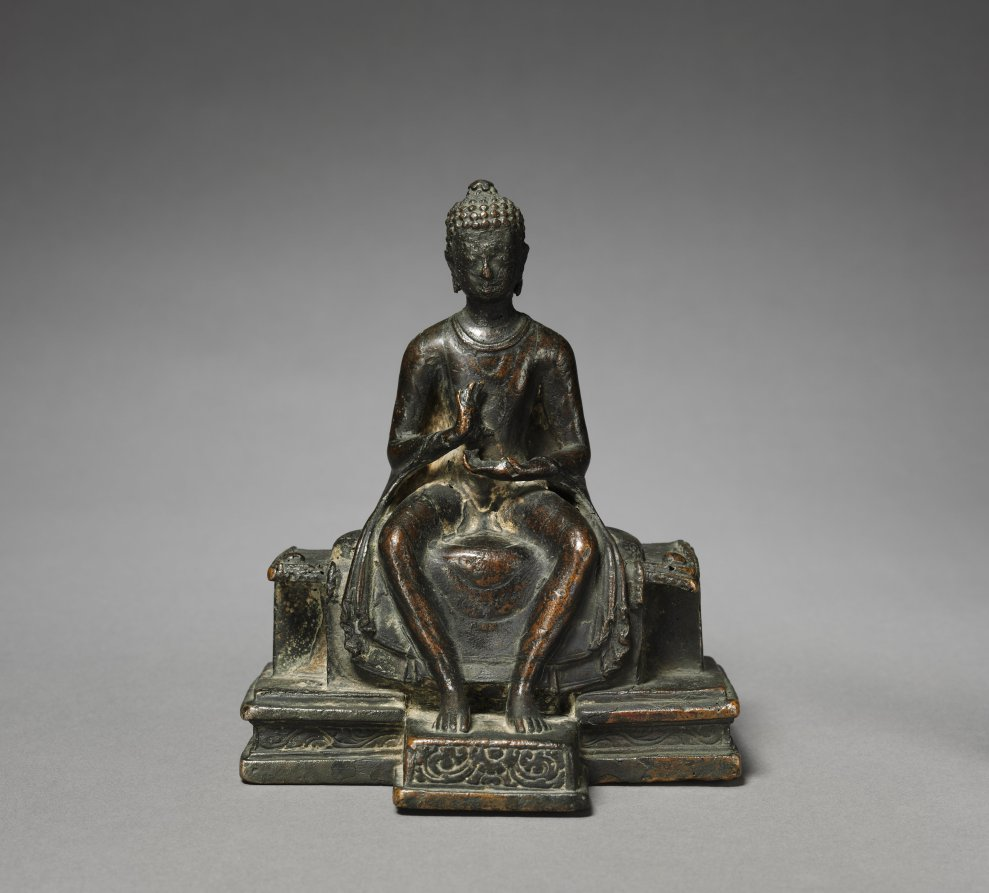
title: Seated Maitreya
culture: Nepal, late Gupta style, late 7th - early 8th century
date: late 600s–early 700s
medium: bronze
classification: Sculpture